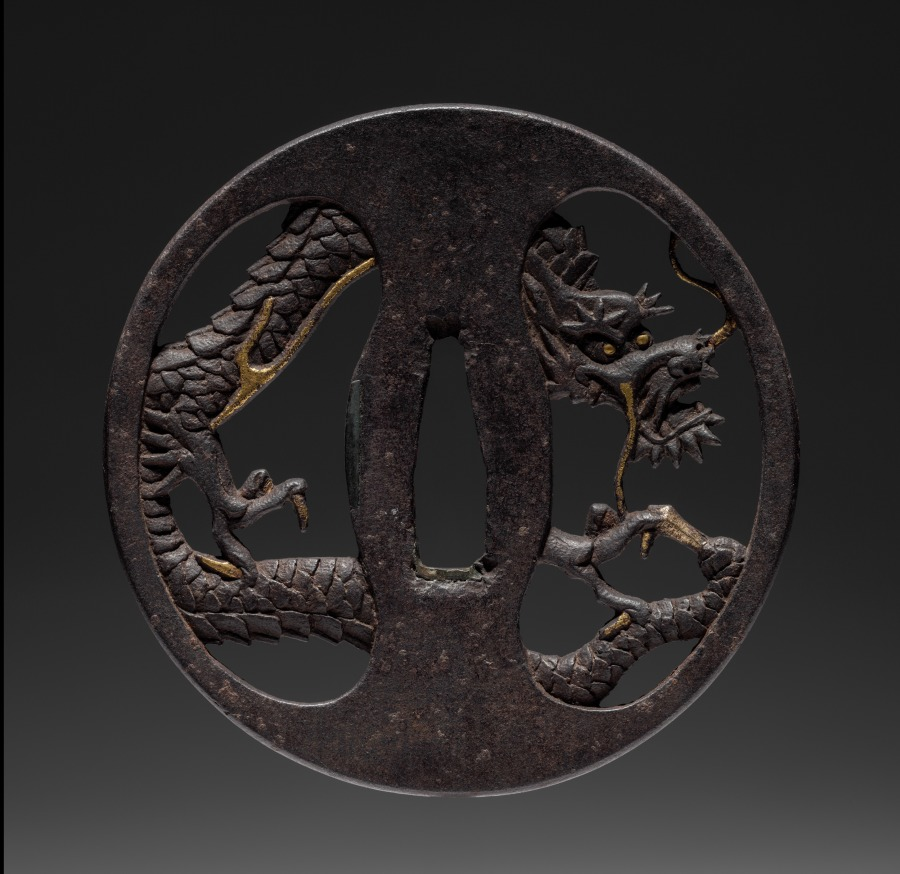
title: Sword Guard (Tsuba) with Dragon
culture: Japan, possibly Edo period (1615-1868)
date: c. 1615–1868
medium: iron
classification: Arms and Armor